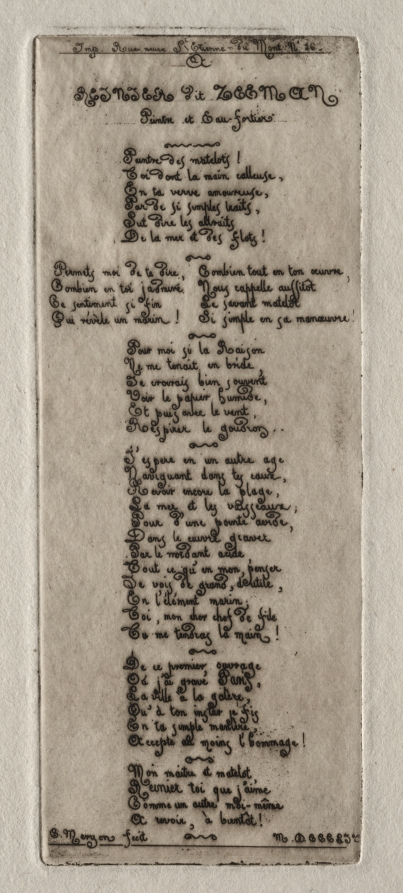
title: Etchings of Paris: Dedication to Reynier Nooms, called Zeeman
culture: France, 19th century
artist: Charles Meryon (French, 1821–1868)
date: 1854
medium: etching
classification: Print